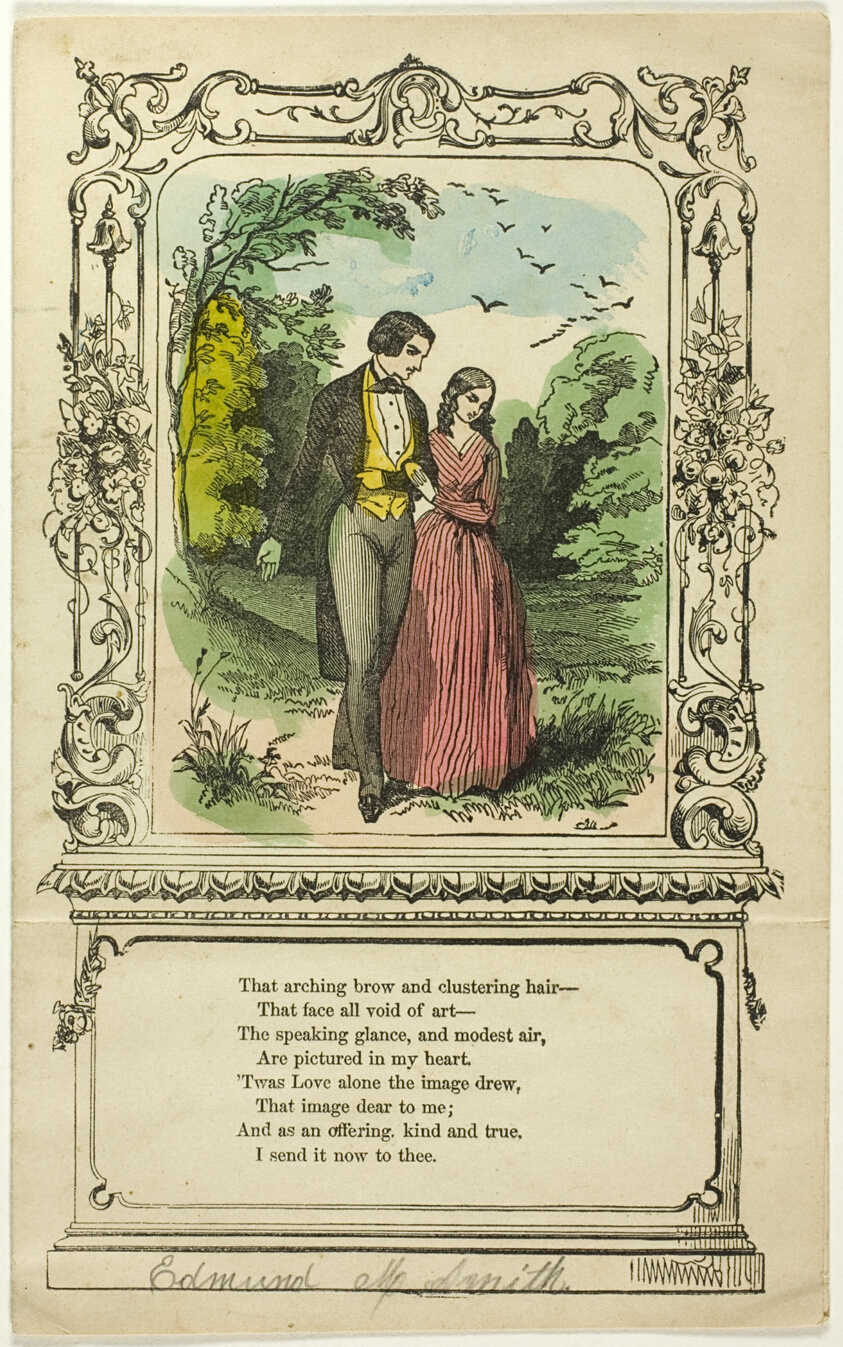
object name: Print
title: That Arching Broth and Clustering Hair (valentine)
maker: Unknown Artist; American, 19th century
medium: Lithograph with hand-coloring on ivory wove paper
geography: United States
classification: etching; print; prints and drawing